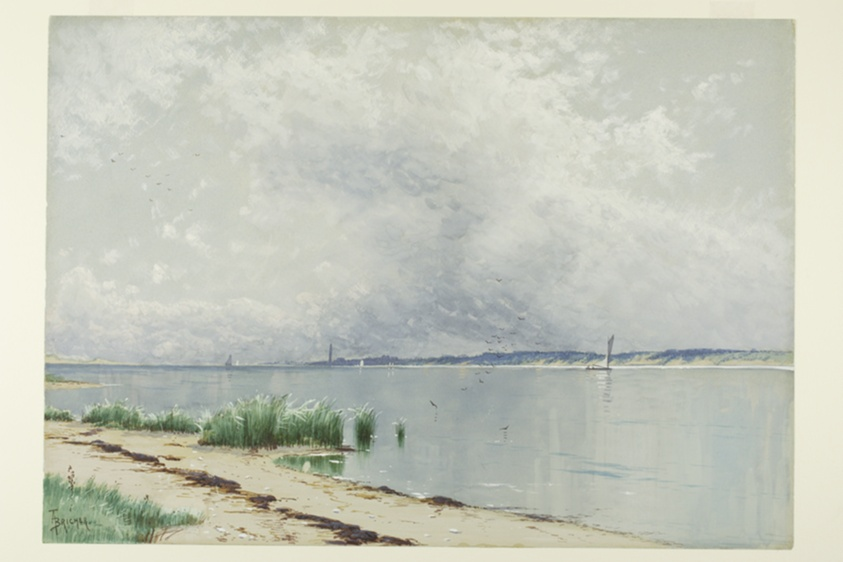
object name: Drawing and Watercolor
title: Reflected Reeds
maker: Alfred Thompson Bricher (American, 1837-1908)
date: c. 1875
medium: Watercolor, heightened with white gouache, over traces of graphite, on blue wove paper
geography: United States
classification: gouache; drawings (visual works); prints and drawing